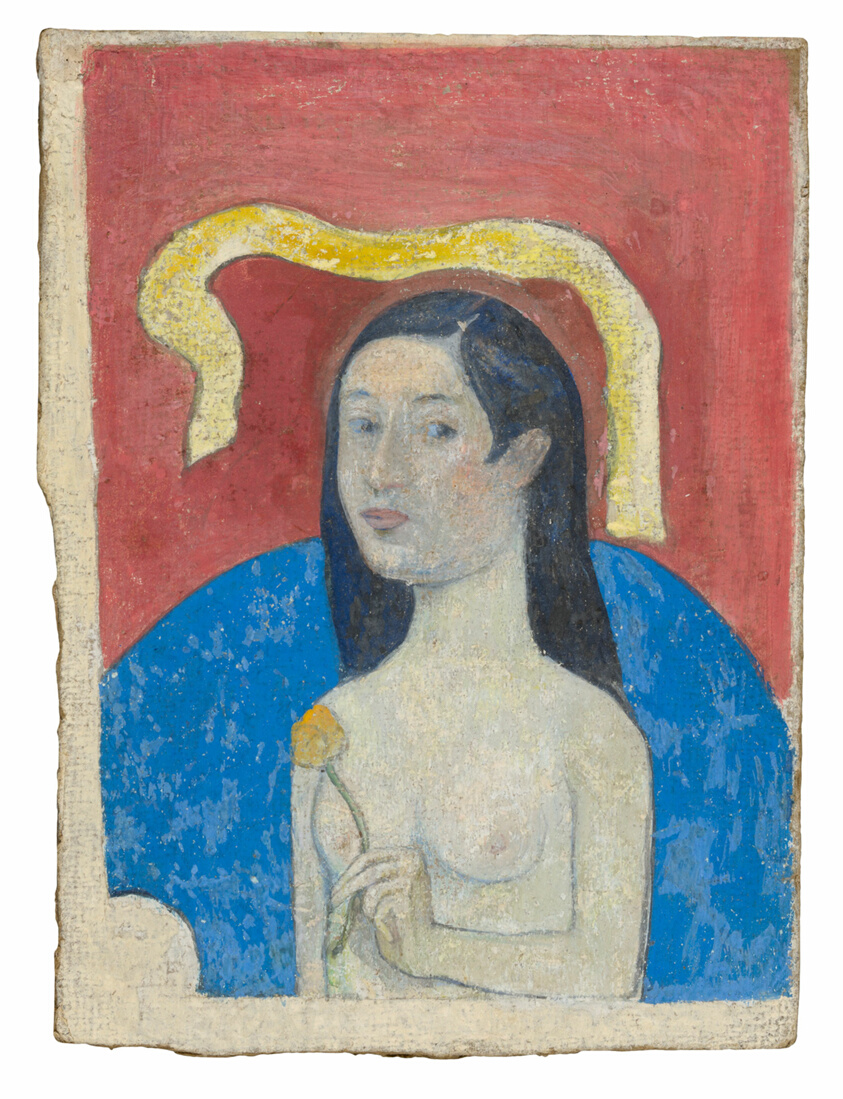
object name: Drawing and Watercolor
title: Portrait of the Artist’s Mother (Eve)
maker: Paul Gauguin (French, 1848-1903)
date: 1889/90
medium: Gouache, over a white ground, on gray millboard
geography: France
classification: gouache; drawings (visual works); prints and drawing